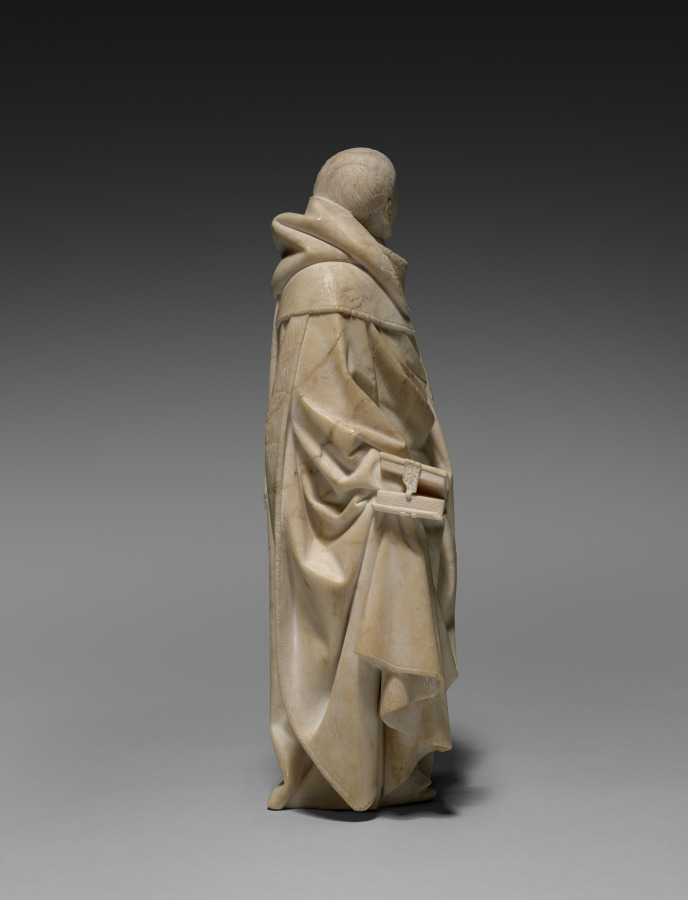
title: Mourner from the Tomb of John the Fearless and Margaret of Bavaria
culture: Spanish, Burgundy, Dijon, 15th century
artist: Jean de la Huerta (Spanish, active Burgundy, 1431–62)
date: 1443–45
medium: salins alabaster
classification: Sculpture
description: This monklike figure has a variously textured monochrome surface. Alabaster’s softness made it easy to carve details like the fabric and fur of the mourner’s robe and the codex pages in his hand. This is one of 40 mourners from an elaborate funeral procession beneath an intricately carved alabaster arcade. This mourner comes from the monastery of Champmol near Dijon, which became a primary burial place for Burgundian dukes. The sculpture was part of the tomb of John the Fearless (1371–1419), commissioned by his son Philip the Good (1396–1467), modeled after the earlier monument for Philip the Bold.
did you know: A plaster cast of this mourner adorns the Tomb of John the Fearless and Margaret of Bavaria in Dijon, France.